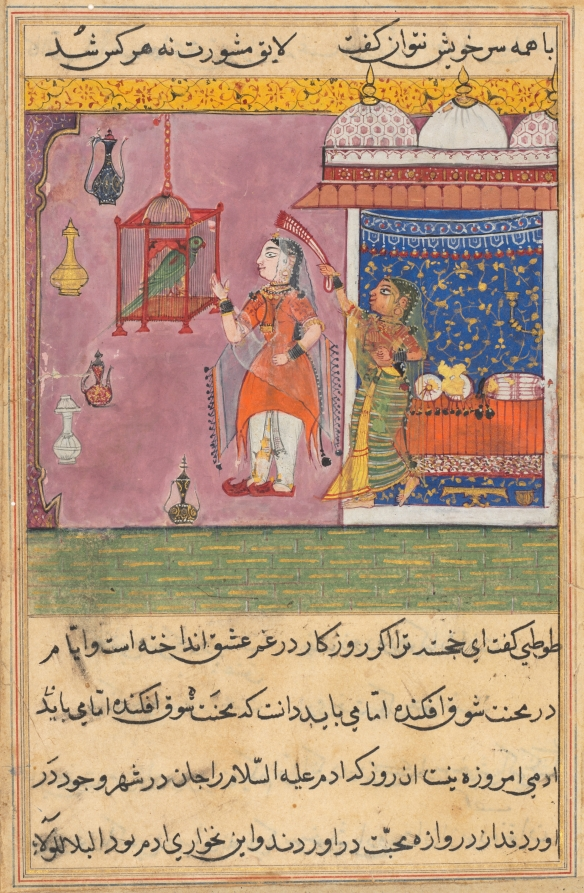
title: The Parrot Addresses Khujasta at the Beginning of the Nineteenth Night, from a Tuti-nama (Tales of a Parrot)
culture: Mughal India, court of Akbar (reigned 1556–1605)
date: c. 1560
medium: gum tempera, ink, and gold on paper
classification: Painting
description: Tuti the parrot begins to tell Khujasta a story about the importance of keeping secrets. The green and gold tiled floor, mauve background, and arabesque, yellow band are vestiges of an earlier paining tradition.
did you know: Khujasta’s attendant whisks flies away with a strip of cloth.